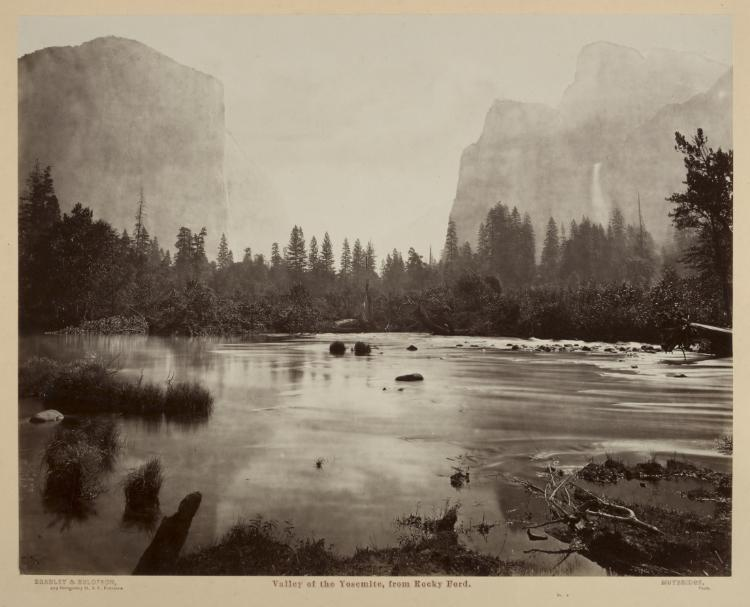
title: Valley of the Yosemite, from Rocky Ford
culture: America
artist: Eadweard J. Muybridge (American, 1830–1904)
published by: Bradley & Rulofson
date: 1872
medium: albumen print from wet collodion negative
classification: Photograph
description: Early in a long, creative career distinguished by landmark studies of animal and human motion, Eadweard J. Muybridge created a remarkable group of photographs of Yosemite Valley in California. During his second journey there, lasting from June through November 1872, he made his most significant and extensive body of landscape photographs, many taken with mammoth glass plate negatives measuring 20 x 24 inches. This image of the valley from Rocky Ford is one of his most luminous and sublime views. Taken in early morning light, this carefully framed and dramatically lit photograph reveals Muybridge's interest in atmospheric conditions, shimmering reflections, and the movement of water.